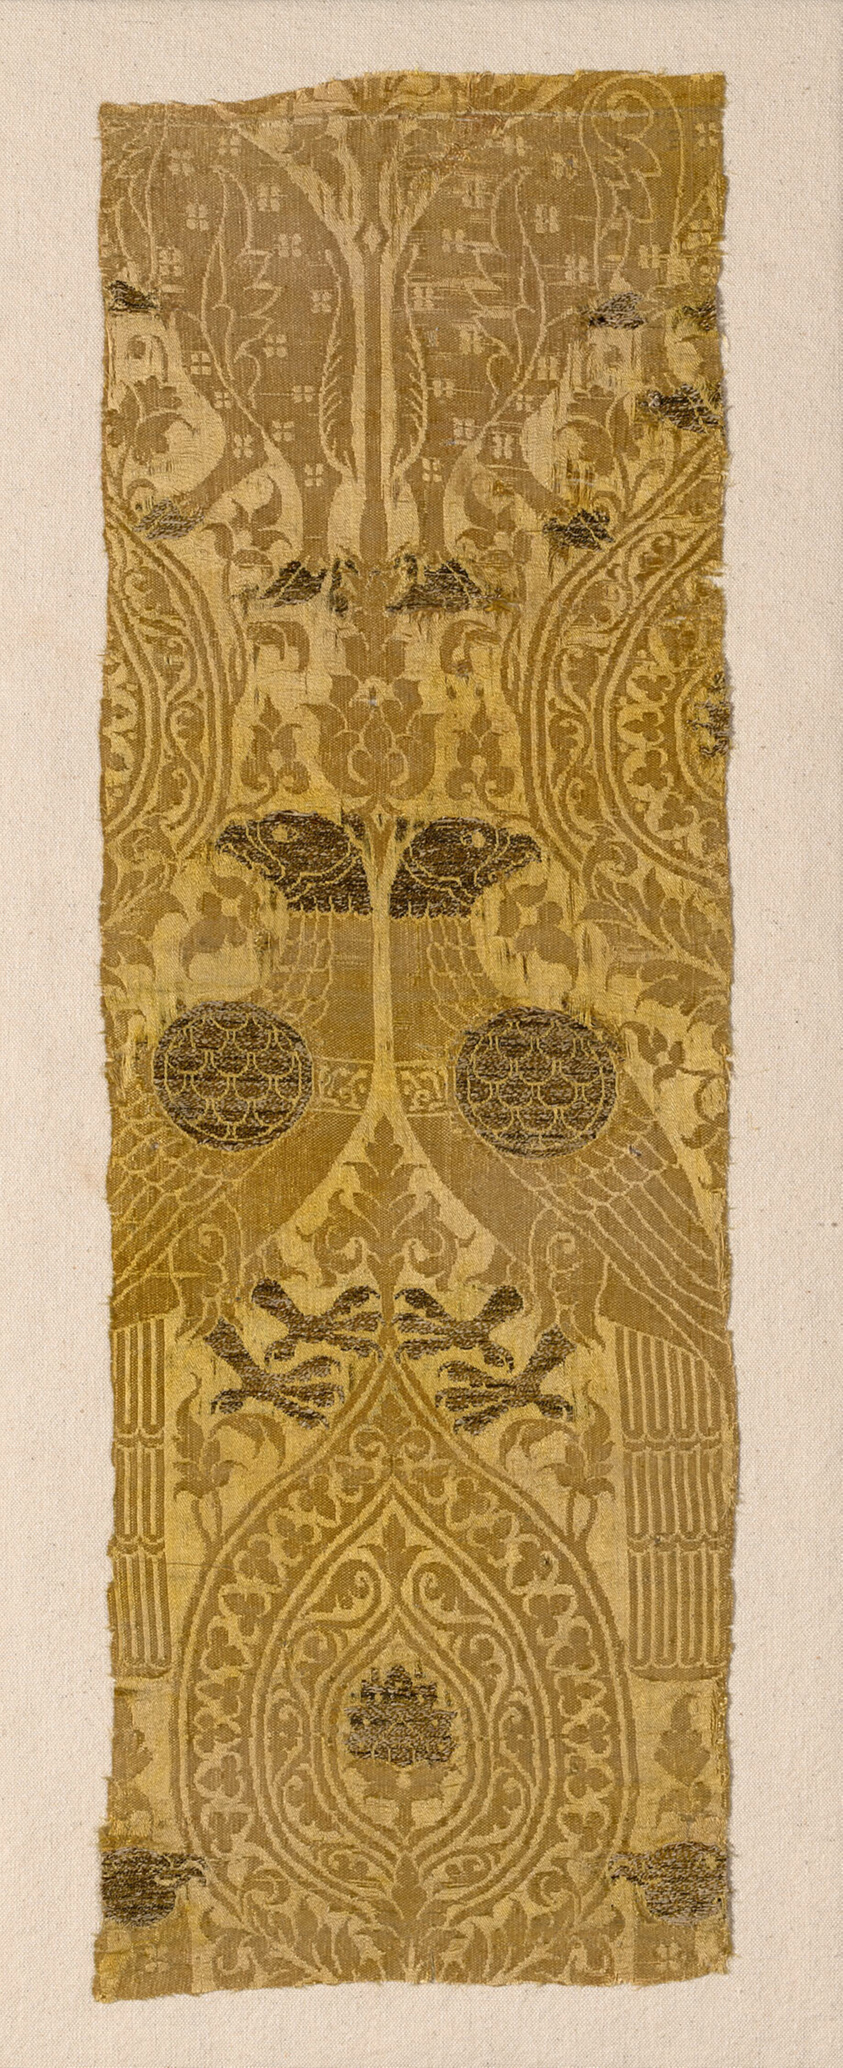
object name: Textile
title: Fragment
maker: Italy or Spain or the Middle East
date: 13th century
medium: Silk, gilt-animal-substrate-wrapped linen, twill weave with plain and twill interlacings of secondary binding warps and patterning and brocading wefts (detached on reverse)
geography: Italy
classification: textile; weaving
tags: eagles, animals, birds